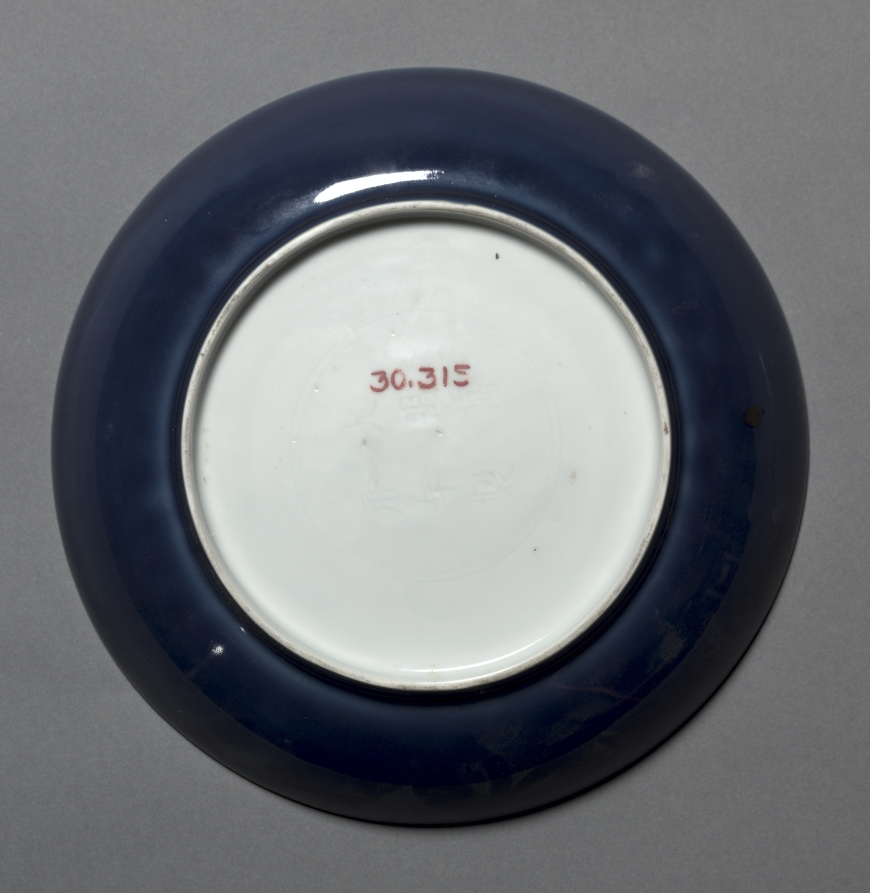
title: Dish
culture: China, Jiangxi province, Jingdezhen kilns, Ming dynasty (1368-1644), Wanli mark and reign (1573-1619)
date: 1573–1619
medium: porcelain with blue glaze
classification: Ceramic